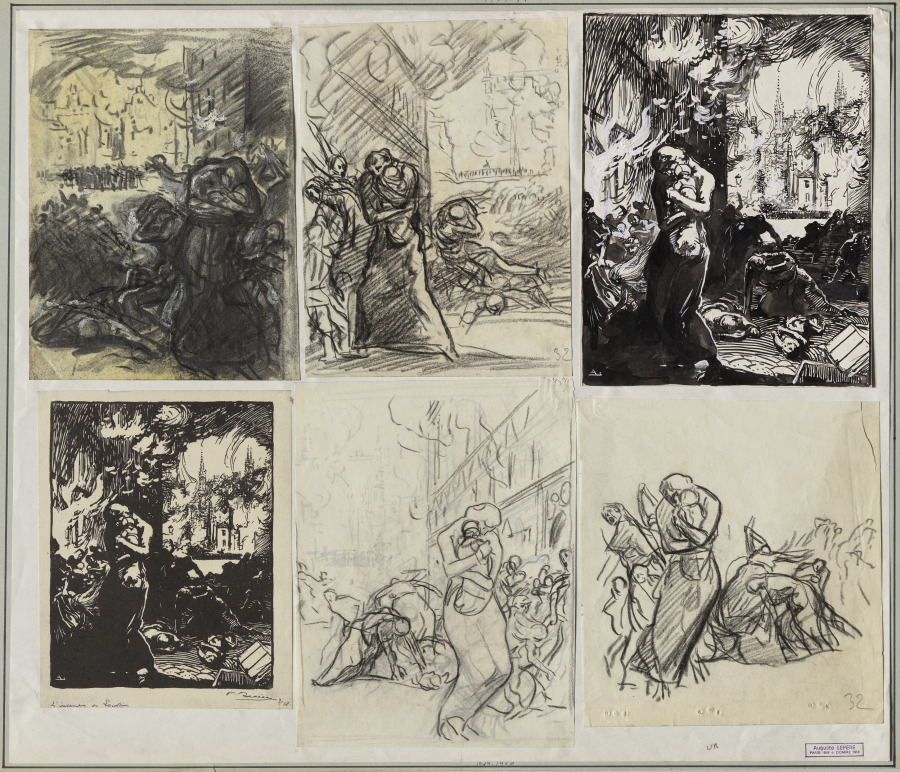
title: L'Incendie de Louvain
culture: France, 20th century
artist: Auguste Louis Lepère (French, 1849–1918)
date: 1914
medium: pen and brush and black ink with white highlights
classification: Drawing